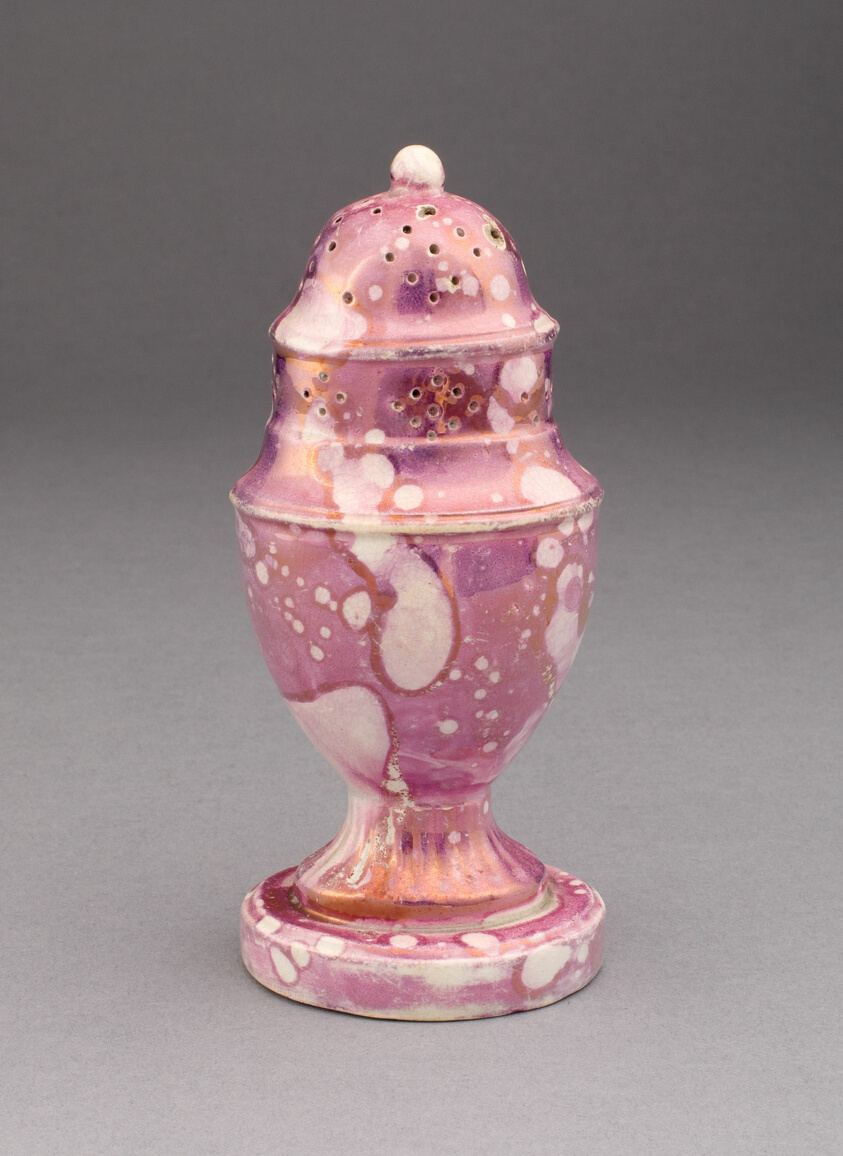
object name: Ceramics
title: Salt or Pepper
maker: England, Sunderland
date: 1810/20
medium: Lead-glazed earthenware with lustre decoration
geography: Sunderland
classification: earthenware; european decorative arts; ceramics